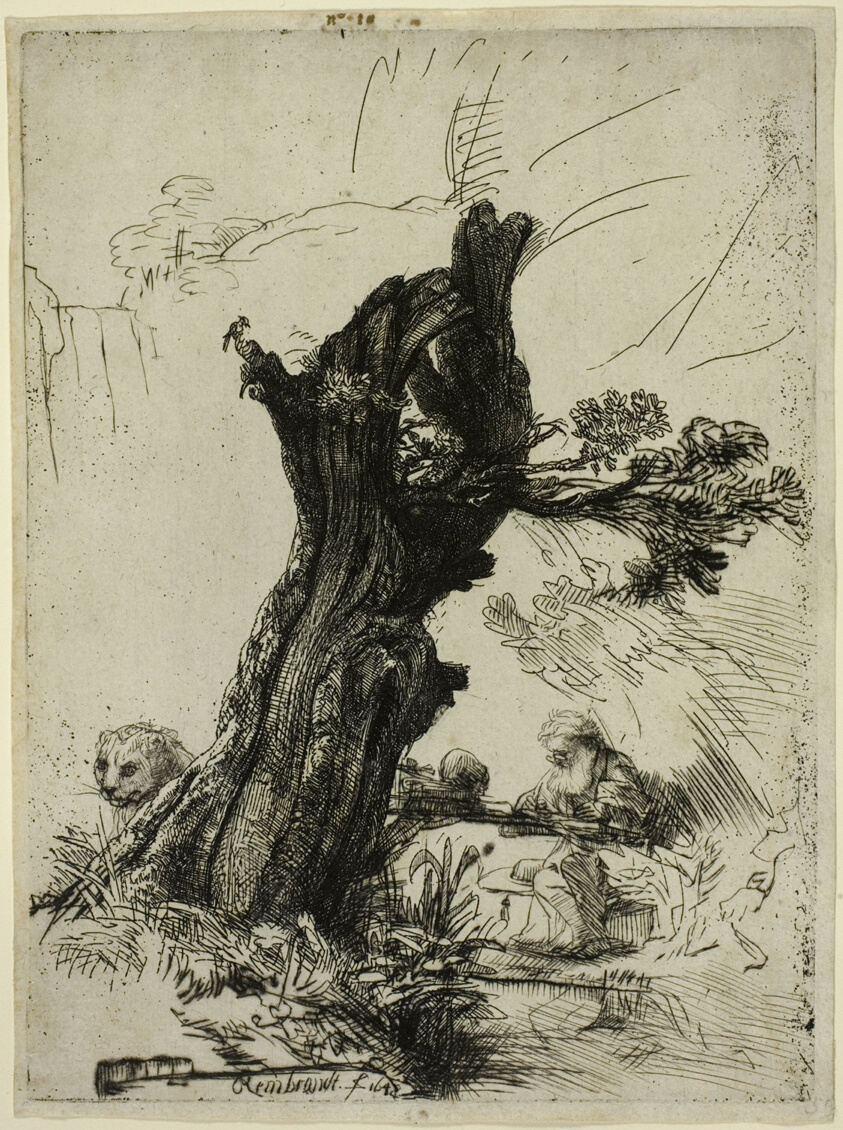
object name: Print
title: St. Jerome Beside a Pollard Willow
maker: Rembrandt van Rijn (Dutch, 1606-1669)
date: 1648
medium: Etching and drypoint on ivory laid paper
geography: Holland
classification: etching; print; prints and drawing; paper; drypoint